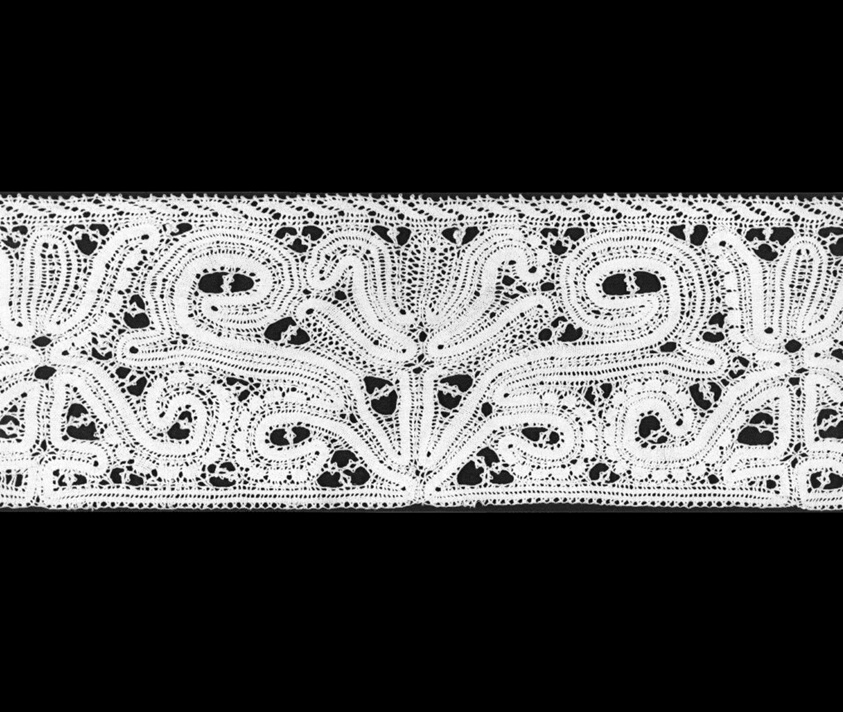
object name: Textile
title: Border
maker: Northern Italy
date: 1701/50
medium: Linen, bobbin part lace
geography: Italy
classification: textile; lace - bobbin